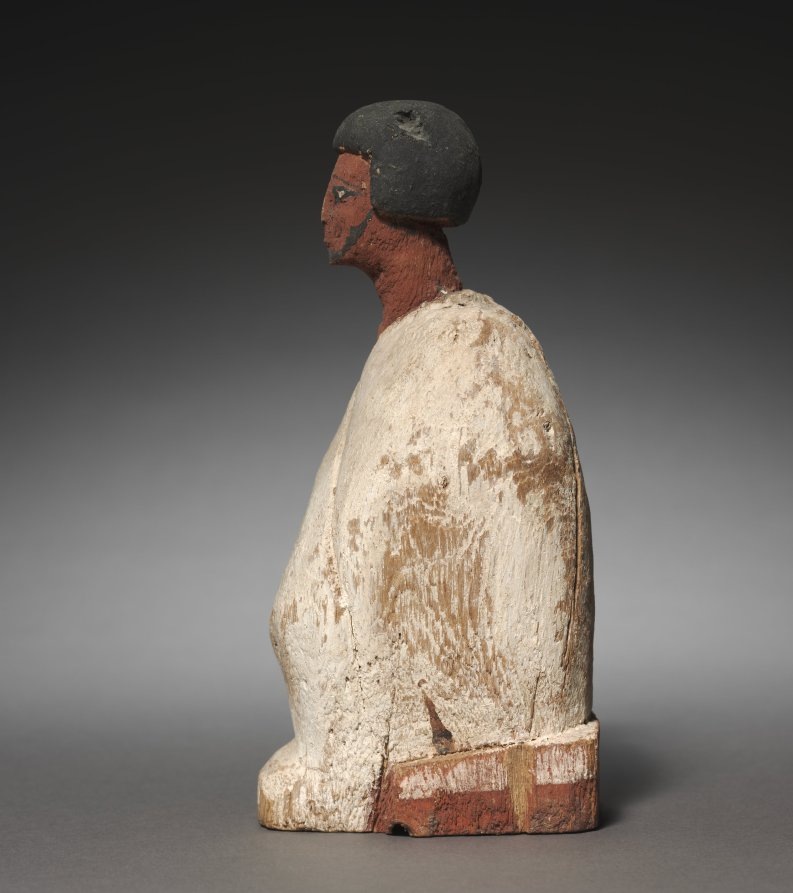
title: Model Boat Owner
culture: Egypt, Middle Kingdom (2040–1648 BCE), Dynasties 11–12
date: 2040–1648 BCE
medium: painted wood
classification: Funerary Equipment